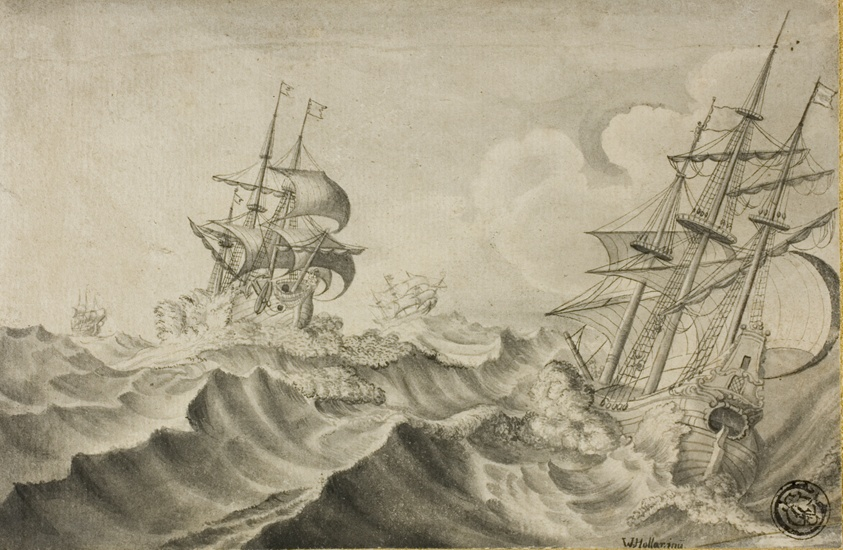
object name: Drawing and Watercolor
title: Copy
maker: Possibly after Wenceslaus Hollar; Bohemian, 1607-1677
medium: Pen and black ink and brush and gray wash, on ivory laid paper, laid down on card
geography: Bohemia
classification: pen and ink drawings; drawings (visual works); prints and drawing